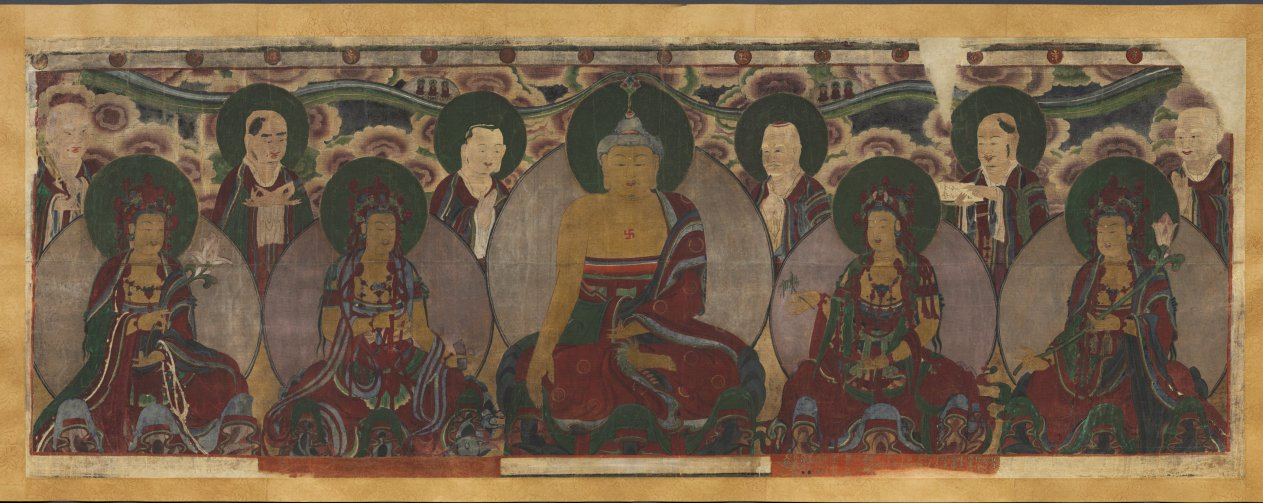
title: Assembly of Buddhist Deities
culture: Korea, Joseon dynasty (1392–1910)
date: 1846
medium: handscroll; ink and color on silk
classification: Painting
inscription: Inscription dated 1846.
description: The central deity in this Buddhist painting is Sākyamuni Buddha, given that he is displaying the earth-touching hand gesture. He is surrounded by several bodhisattvas and disciples. The inscription below, even though partly erased, tells us that the painting was created in 1846 and was hung in the monks’ residential hall.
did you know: The inscription below, even though partly erased, tells us that the painting was hung in the monks’ residential hall.